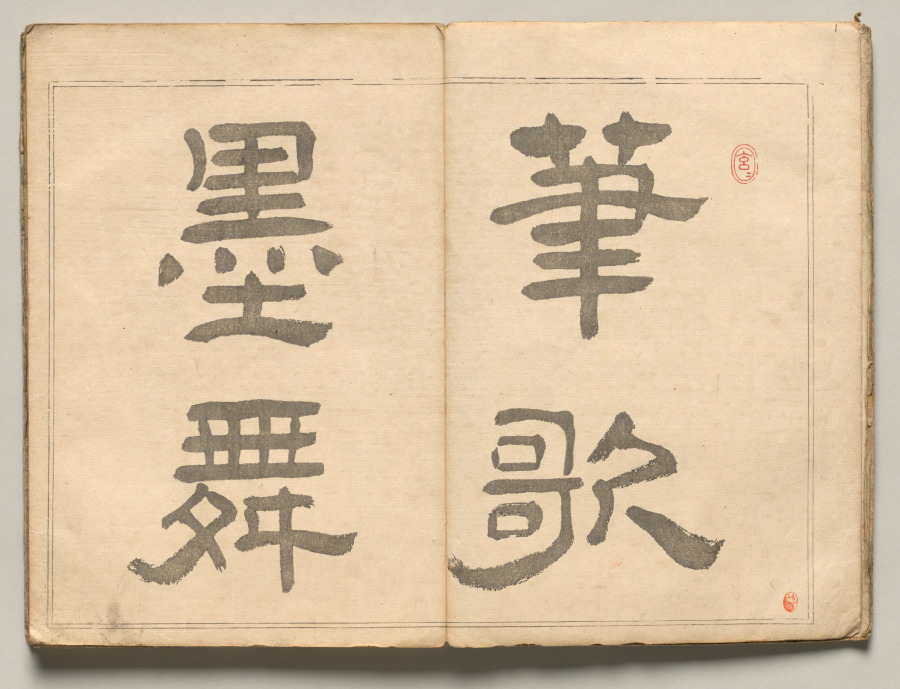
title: Calligraphic Motto from Ōkyo Picture Book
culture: Japan, Edo period (1615–1868)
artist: after Maruyama Ōkyo (Japanese, 1733–1795)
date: 1850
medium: accordion-style woodblock printed folding-book; ink and color on paper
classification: Bound Volume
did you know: This impression of a book of woodblock-printed designs is missing a spread that depicts a crane.